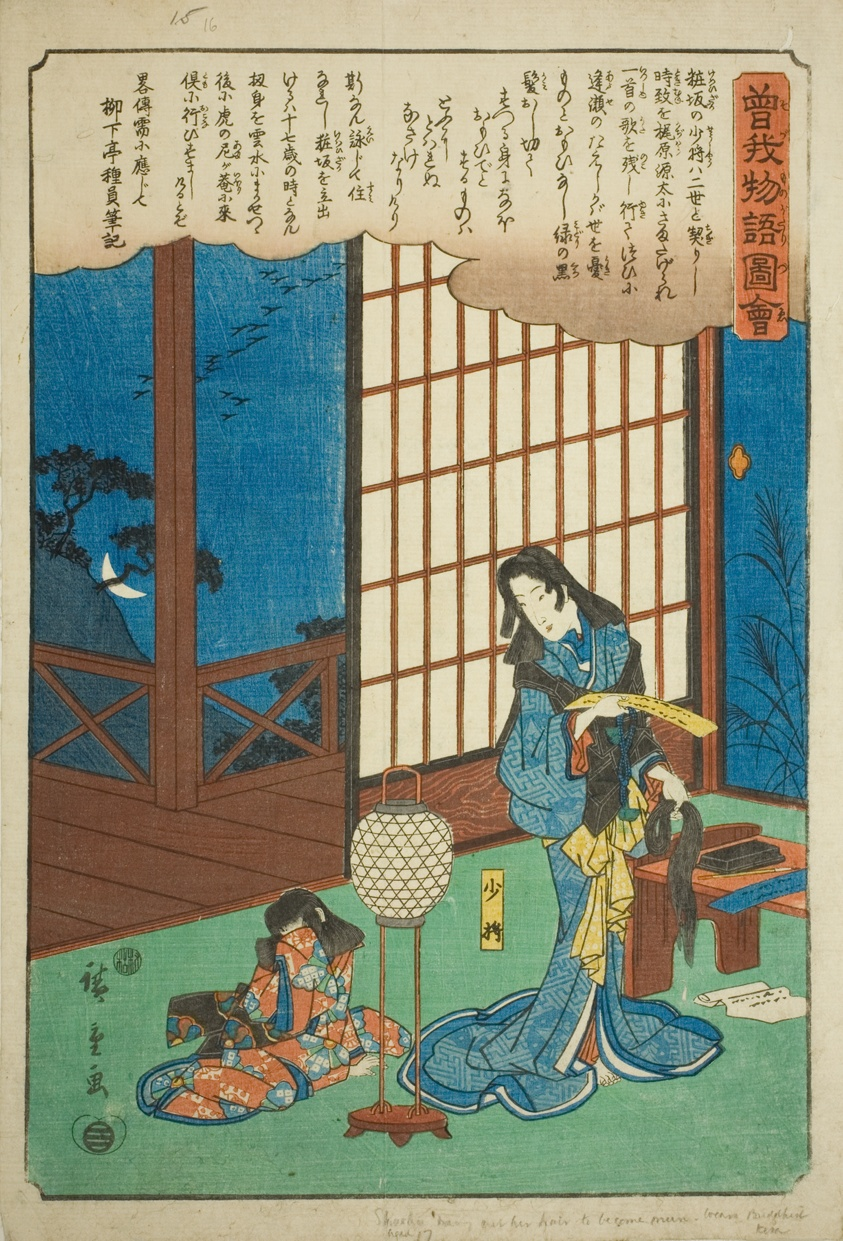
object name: Print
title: Kewaizaka no Shosho cutting her hair to become a nun, from the series "Illustrated Tale of the Soga Brothers (Soga monogatari zue)"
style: Japanese (culture or style)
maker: Utagawa Hiroshige 歌川 広重; Japanese, 1797-1858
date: c. 1843/47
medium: Color woodblock print; oban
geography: Japan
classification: woodblock print; print; asian art